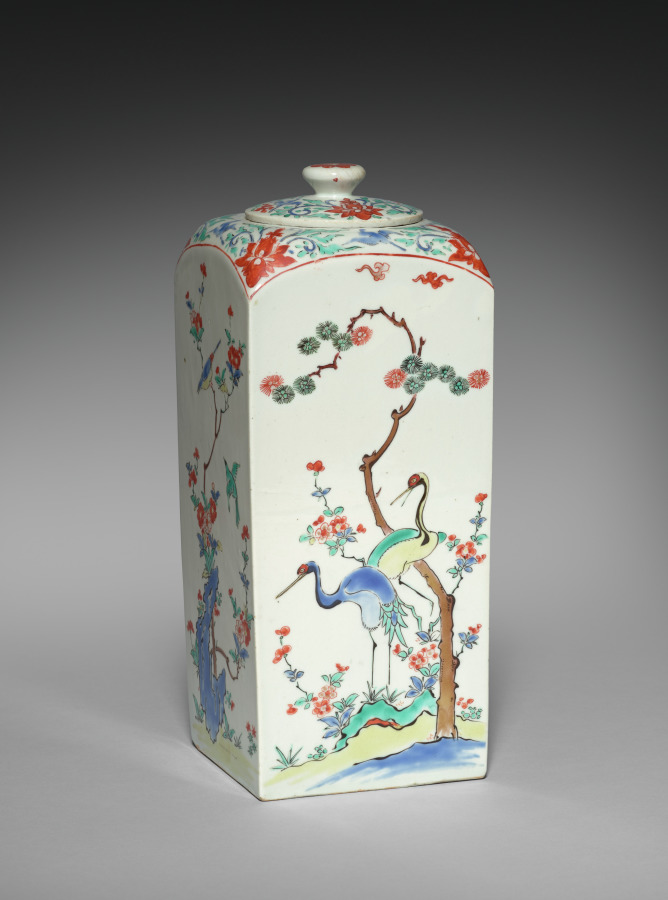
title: Square Jar with Birds and Flowers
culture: Japan, Edo period (1615–1868)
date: late 1600s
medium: Porcelain with overglaze color enamels and gold (Hizen ware, Kakiemon type)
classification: Ceramic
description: This lidded square jar was likely paired with a complementary yet nonidentical mate. The pine tree, plum, and bamboo together form the frequently depicted motif known as the Three Friends of Winter (shōchikubai), so named because of their hardy perseverance in the cold. Each side also features a pair of birds, including cranes on one face and pheasants on another.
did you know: A jar like this was fired at a high temperature, painted with colored enamels, and then fired again at a lower temperature.